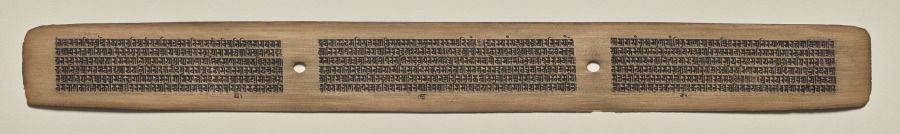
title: Text, Folio 86 (recto), from a Manuscript of the Perfection of Wisdom in Eight Thousand Lines (Ashtasahasrika Prajnaparamita-sutra)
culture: Eastern India, Bihar, Vikramashila Monastery. Painting: Nepal, Kathmandu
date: Sunday, September 14, 1119 (year 239 of the Newar Samvat in the month of Ashvina)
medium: gum tempera and ink on palm leaves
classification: Painting